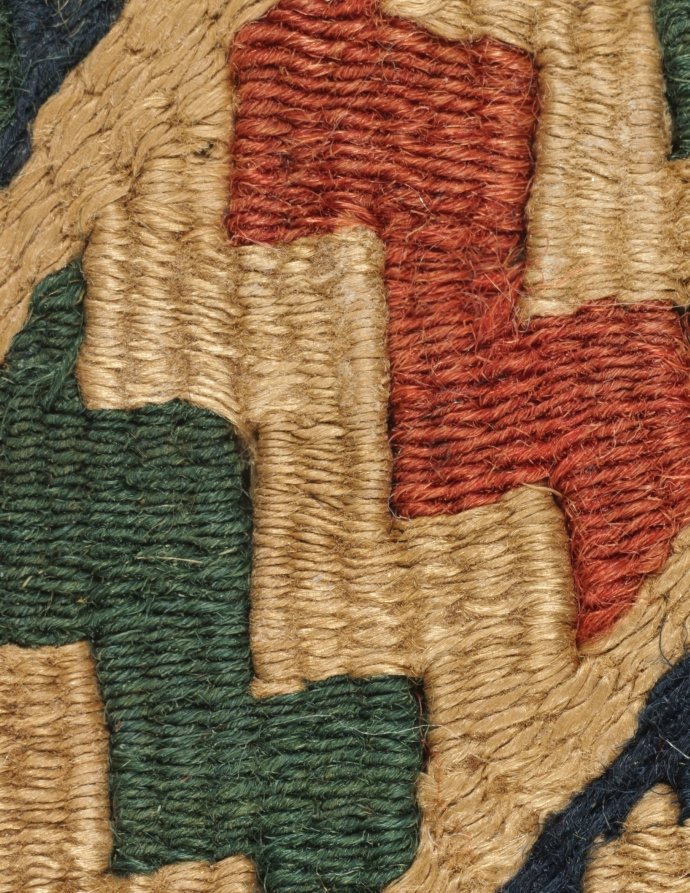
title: Fragmentary Ornament from a Tunic with Lozenges and Medallions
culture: Egypt, Abbasid period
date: mid 700s - mid 800s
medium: tapestry weave; wool and linen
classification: Textile